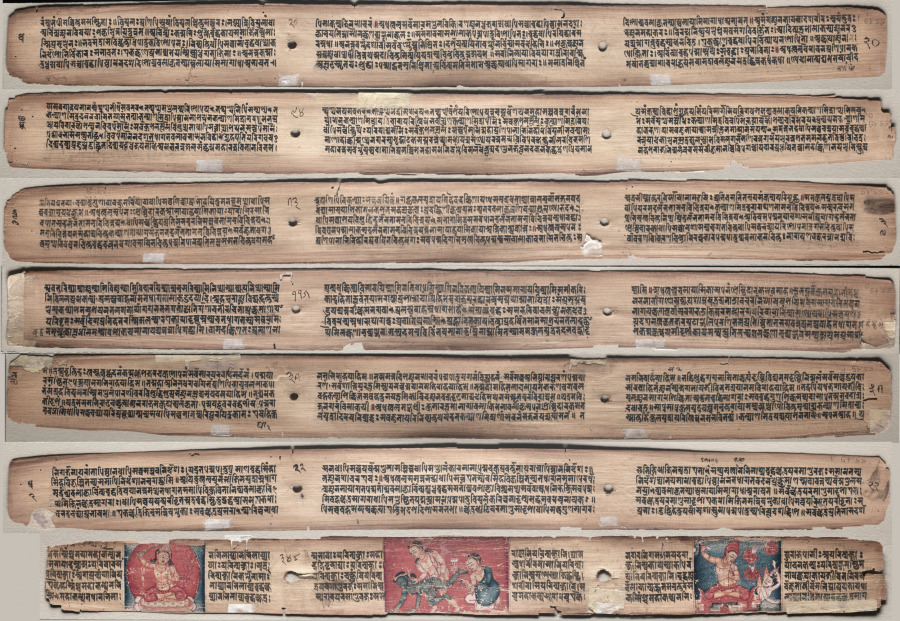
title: Seven Leaves from a Manuscript of the Gandavyuha-sutra (Scripture of the Supreme Array)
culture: Nepal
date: 1000s-1100s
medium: Gum tempera and ink on palm leaves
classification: Painting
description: These pages come from a long horizontal book of 355 palm leaves, now dispersed among many collections. Featuring the pilgrim Sudhana on his quest to reach enlightenment, the text was especially influential in the spread of Buddhism to East Asia. These leaves are from the sole surviving illustrated manuscript of this text in its original language of Sanskrit.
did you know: Russian artist Svyatoslav Roerich (1904–1993) collected 144 pages of this manuscript in India.